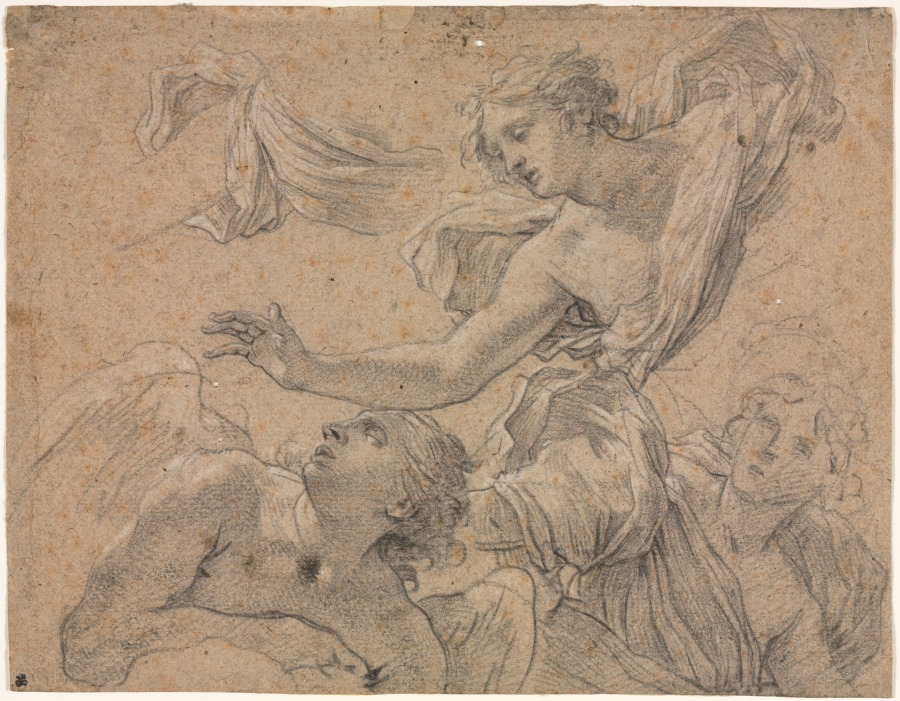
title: Studies of Angels (recto); Panthea before Cyrus? (verso)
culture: France, 17th century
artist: Michel Dorigny (French, 1617–1665)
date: 1655–60?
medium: black chalk heightened with white chalk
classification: Drawing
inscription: verso, lower left, in graphite: 225911 [sideways]; lower left, in graphite: 302 [underlined] / 1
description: Dorigny was the collaborator and son-in-law of Simon Vouet, the leading painter working in Paris in the mid-1600s. Their drawing styles are similar, and this sheet was once attributed to Vouet. However, the airy, floating drapery, firm contour lines, and regular parallel hatching lines are all typical of Dorigny's technique in black chalk. Although we do not know of a painting to which this drawing relates, the flying angels indicate that Dorigny had a religious subject in mind when he drew them.